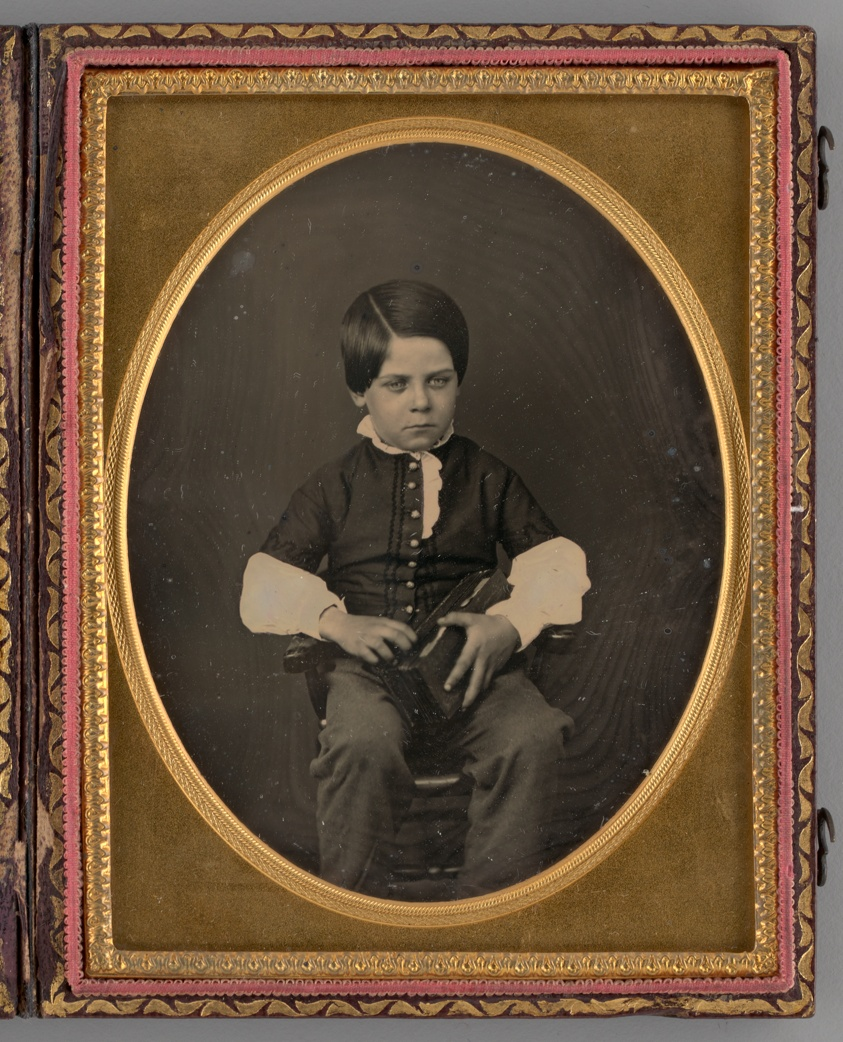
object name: Photograph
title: Untitled (Portrait of a Seated Boy)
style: 19th century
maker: Nelson's Gallery; American, active 19th century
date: 1853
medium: Daguerreotype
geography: United States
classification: portrait; photograph; photographic process; photography; portrait; daguerreotype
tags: lundberg collection, portrait, Male, boys, portraits, portraits: child subject